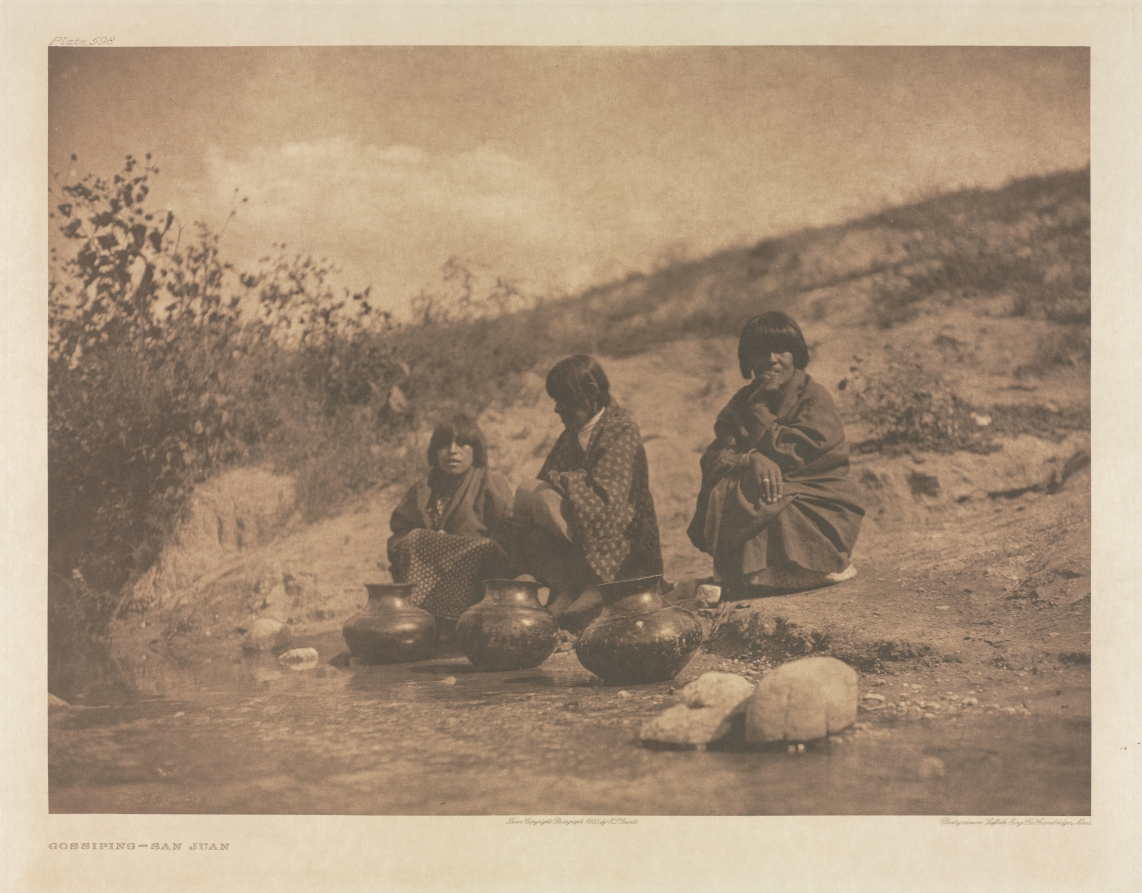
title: Portfolio XVII, Plate 598: Gossiping - San Juan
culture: America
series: The North American Indian: being a series of Portfolios picturing and describing the Indians of the United States, the Dominion of Canada, and Alaska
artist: Edward S. Curtis (American, 1868–1952)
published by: The University Press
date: 1905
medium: photogravure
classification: Portfolio